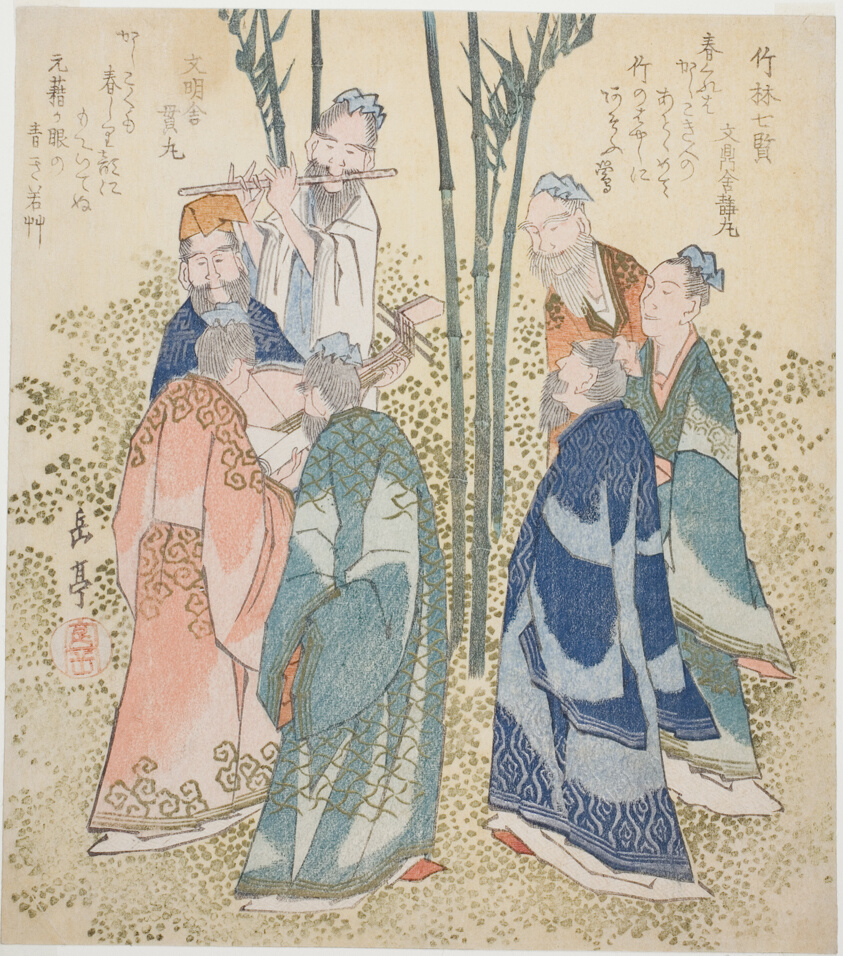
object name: Print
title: The Seven Sages of the Bamboo Grove (Chikurin shichiken), from the series "A Set of Ten Famous Numbers for the Katsushika Circle (Katsushikaren meisu juban)"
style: Japanese (culture or style)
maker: Yashima Gakutei (Japanese, 1786 (?)-1868)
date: c. 1828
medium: Color woodblock print; shikishiban, surimono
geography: Japan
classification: woodblock print; print; asian art